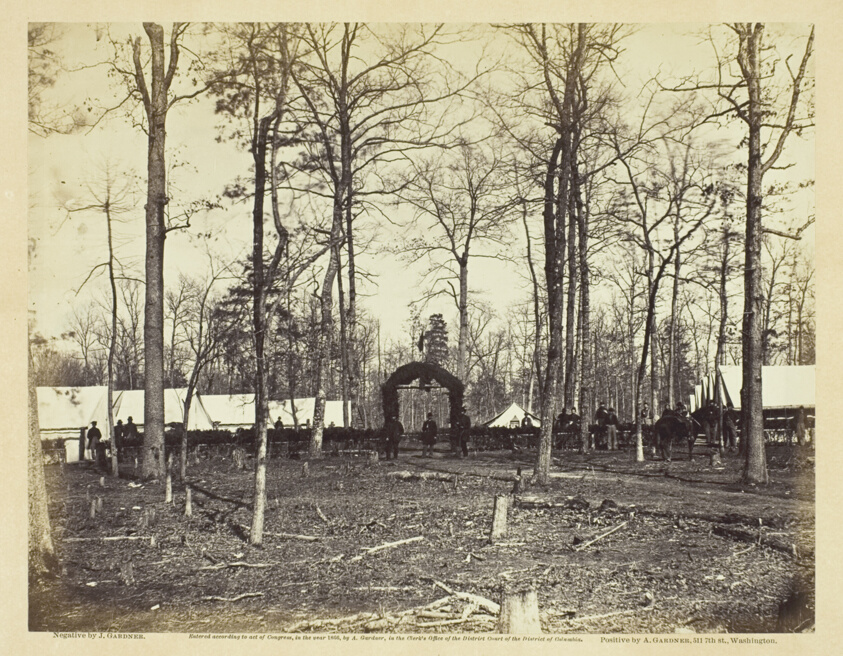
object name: Photograph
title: Field Hospital, Second Army Corps, Brandy Station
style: 19th century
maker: James Gardner (American, born Scotland, 1832–after 1865)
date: February 1864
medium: Albumen print, pl. 54 from the album "Gardner's Photographic Sketch Book of the War, Volume II" (1866)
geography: United States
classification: photograph; albumen silver print; photography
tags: Collected by Hugh Edwards, Gardner's Photographic Sketch Book